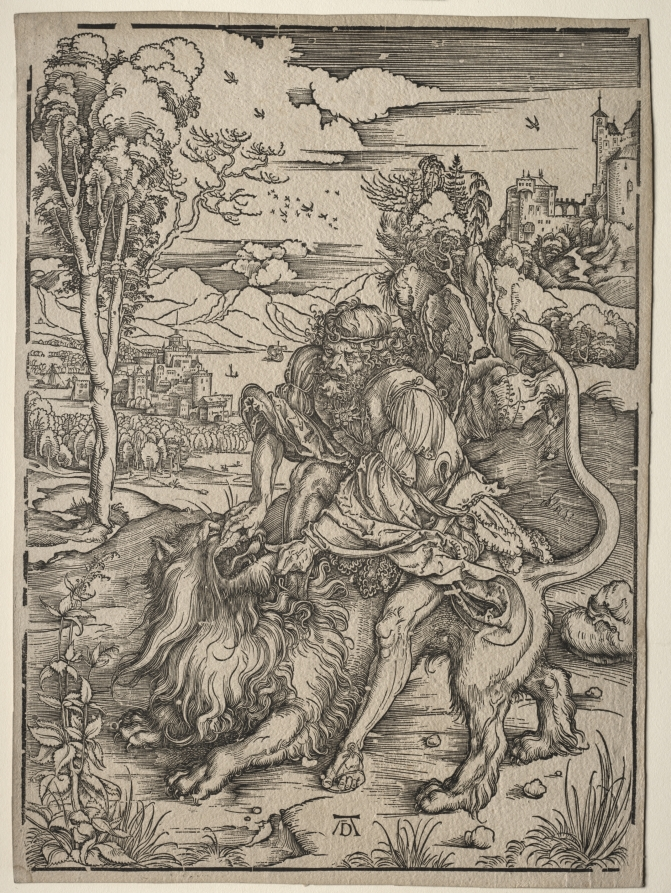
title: Samson Killing the Lion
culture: Germany, late 15th-early 16th century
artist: Albrecht Dürer (German, 1471–1528)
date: c. 1492–98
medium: woodcut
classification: Print